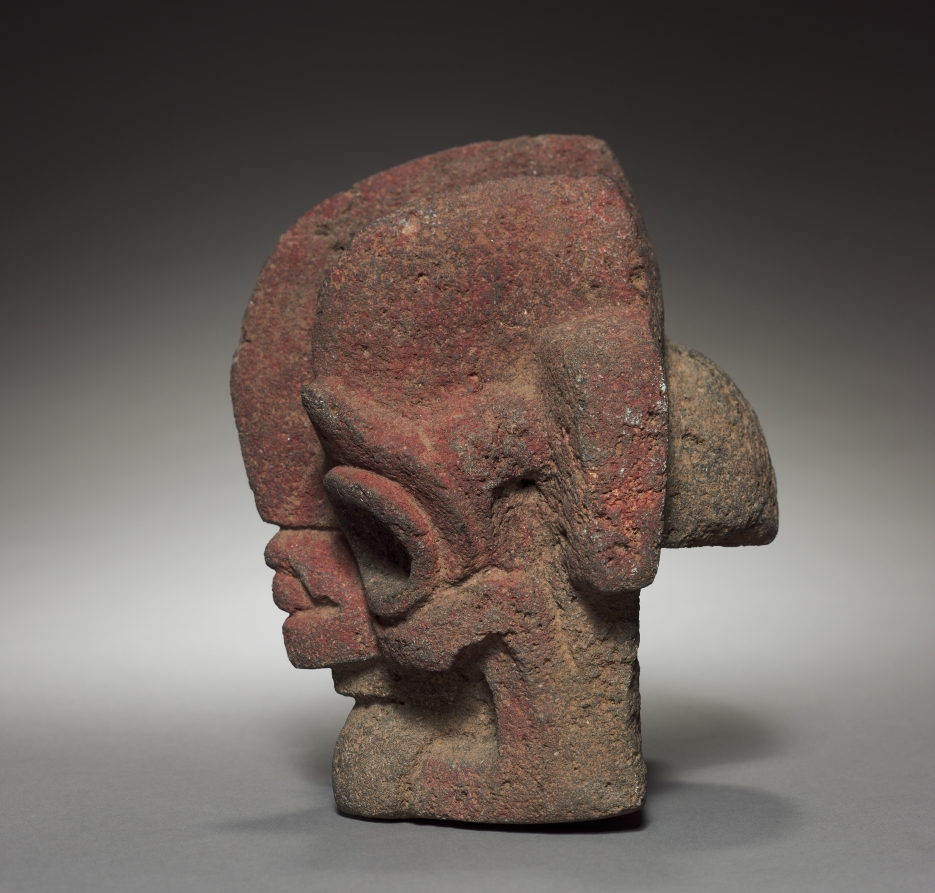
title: Head Hacha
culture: Mexico, Veracruz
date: 300–900 CE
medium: gray volcanic stone with red pigment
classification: Sculpture